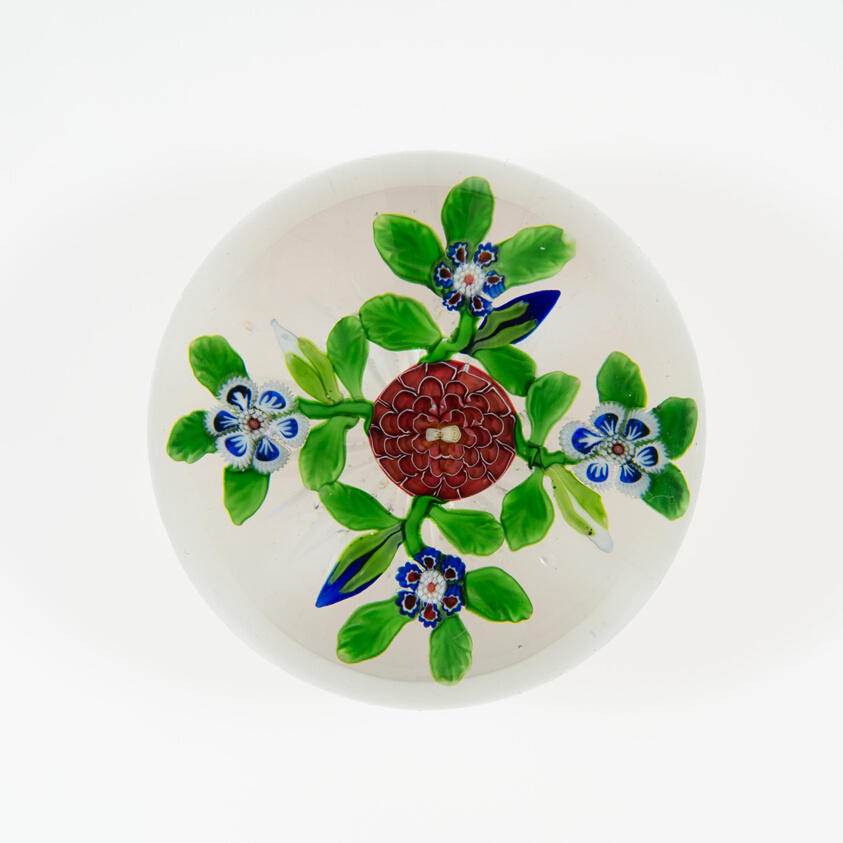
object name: Glass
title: Paperweight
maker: Baccarat Glassworks (Cristalleries de Baccarat); Lorraine, France, founded 1764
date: 19th century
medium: Glass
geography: France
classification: paperweight; glass